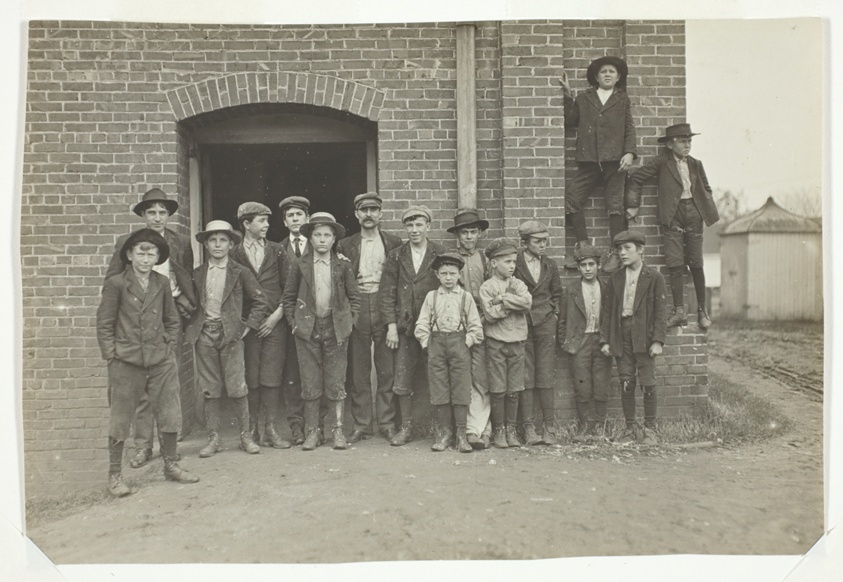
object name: Photograph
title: Noon Hour, King Mfg. Co., Augusta, Georgia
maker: Lewis Wickes Hine (American, 1874–1940)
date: January 1909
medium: Gelatin silver print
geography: United States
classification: gelatin silver (developing-out-paper) pr; photographic process; photography; photograph